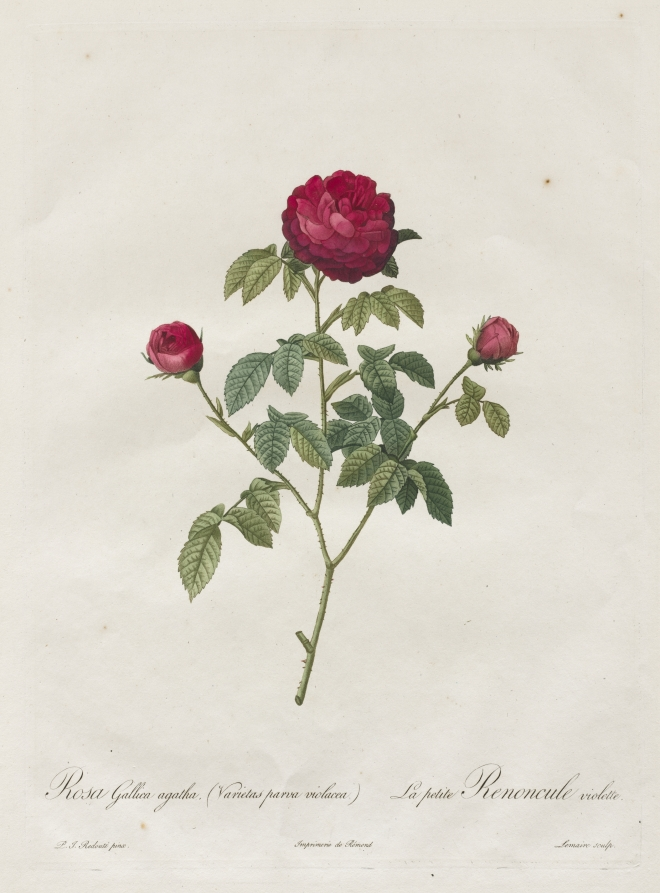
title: Provence or French Rose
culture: France, 19th century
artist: Henri Joseph Redouté (French, 1766–1853)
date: 1817–1824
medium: stipple and line engraving, with hand coloring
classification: Print